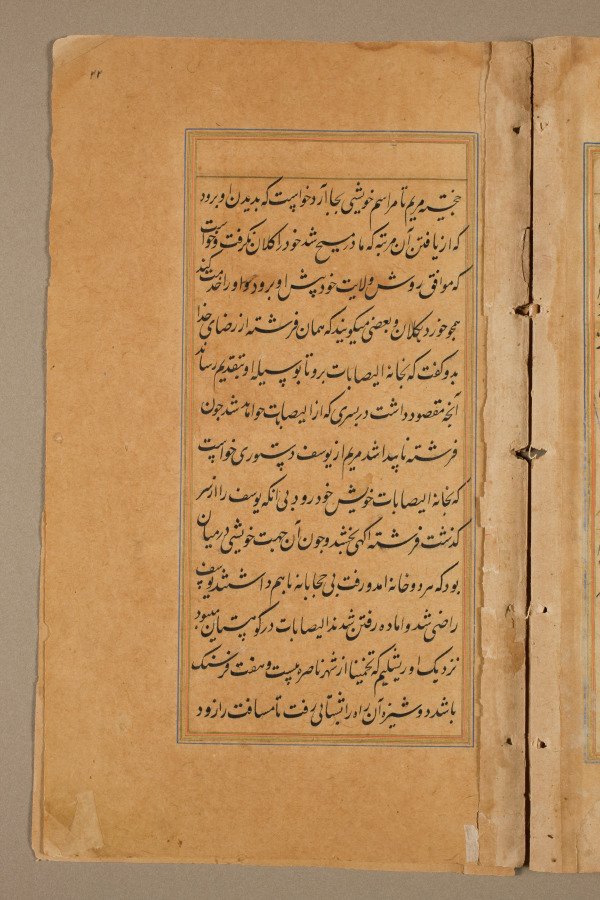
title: Text page from a Mirror of Holiness (Mir’at al-quds) of Father Jerome Xavier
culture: Mughal India, Allahabad, made for Prince Salim (1569–1627)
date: 1602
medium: Ink and gold on paper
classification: Manuscript